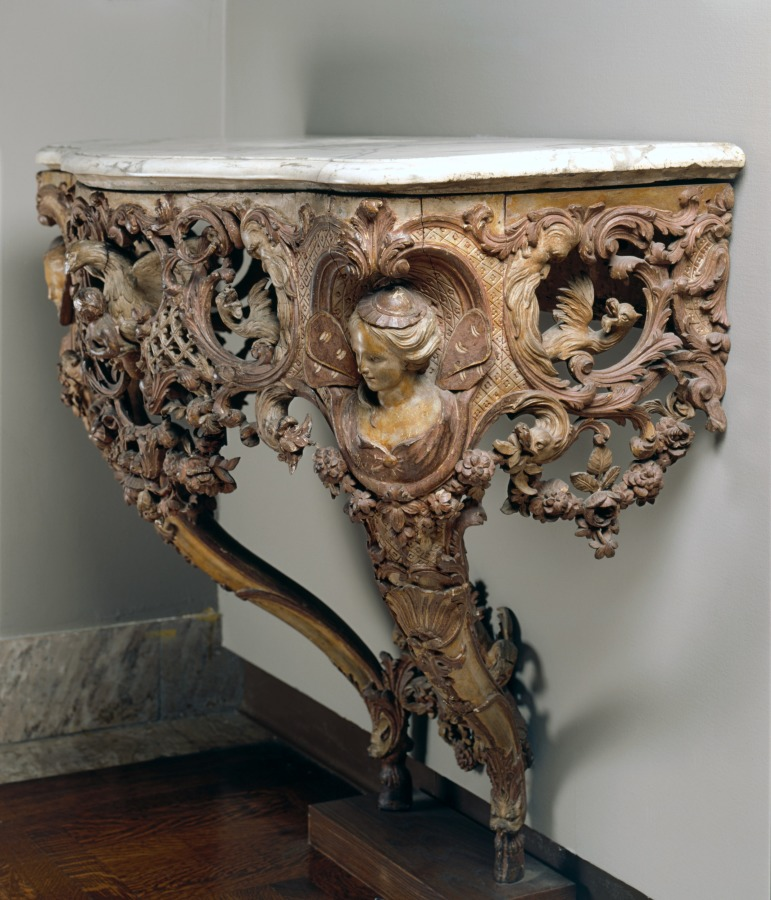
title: Console Table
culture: France, 18th century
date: c. 1720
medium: carved and painted wood, marble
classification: Furniture and woodwork